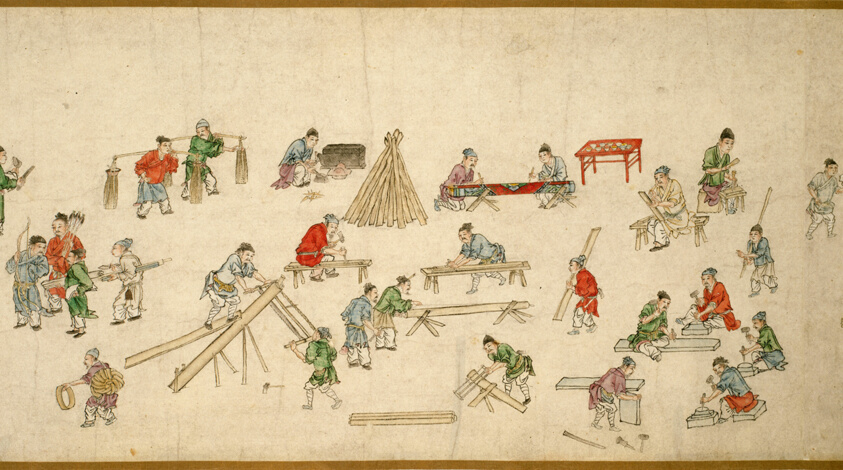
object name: Painting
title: Street Scenes in Times of Peace 太平風會圖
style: Chinese (culture or style)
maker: Zhu Yu (Zhu Junbi) 朱玉（朱君璧）; Chinese, 1293-1365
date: Yuan dynasty (1279–1368), 14th century 元朝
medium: Handscroll; ink and colors on paper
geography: China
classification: handscroll; painting; asian art